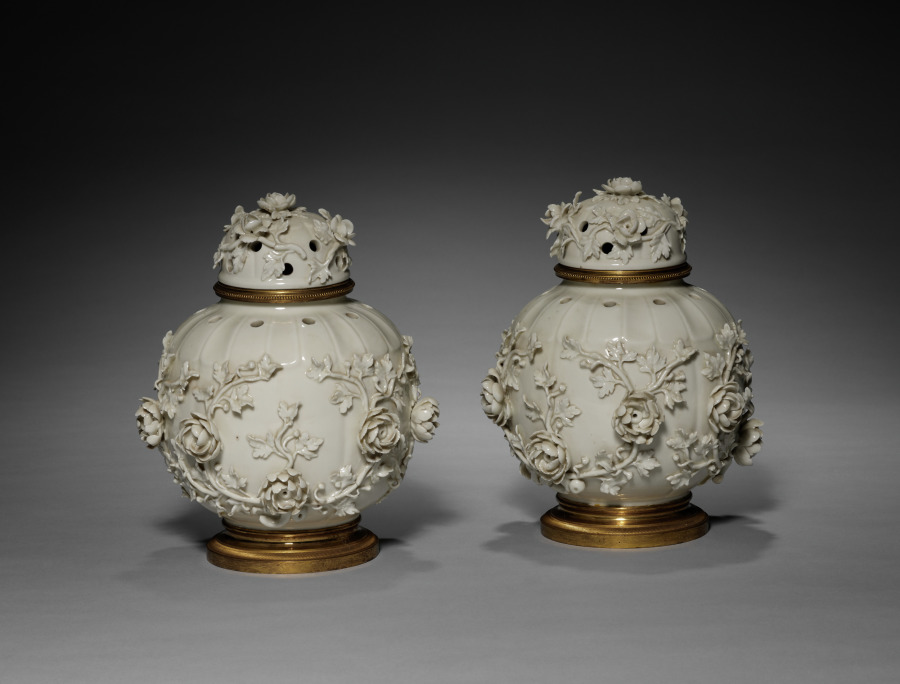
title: Pair of Potpourri Vases with Covers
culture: France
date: c. 1860–80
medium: blanc-de-chine porcelain; gilt bronze mounts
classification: Ceramic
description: These vases were likely made by the celebrated Parisian ceramics firm of Edmé Samson (1810-91). To cater to the resurgence in taste for 18th-century designs, the Samson firm specialized in making reproductions of rare 18th-century European porcelains, especially those from firms that had already copied Chinese porcelains. In this case, these vases are designs taken from models produced by the St. Cloud factory in the 1750s after earlier Qing dynasty Chinese ceramics. However, the telltale sign that these vases are made by Samson and not St. Cloud is that the originals would have been made from a soft-paste porcelain (fired at a lower temperature), while these examples are made of hard-paste porcelain (fired at the highest temperature).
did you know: Potpourri vases always have holes in the top to let the scent of dried spices and flowers contained within freshen the air around them.